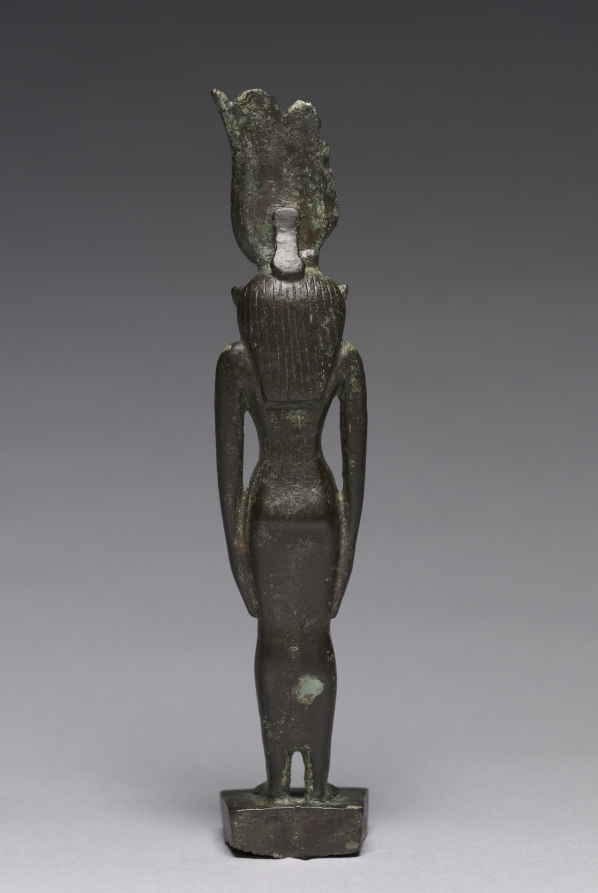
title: Statuette of Hathor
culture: Egypt, Late period (715–332 BCE), Dynasty 26 or later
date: 664–30 BCE OR 664–330 BCE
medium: bronze, solid cast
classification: Sculpture